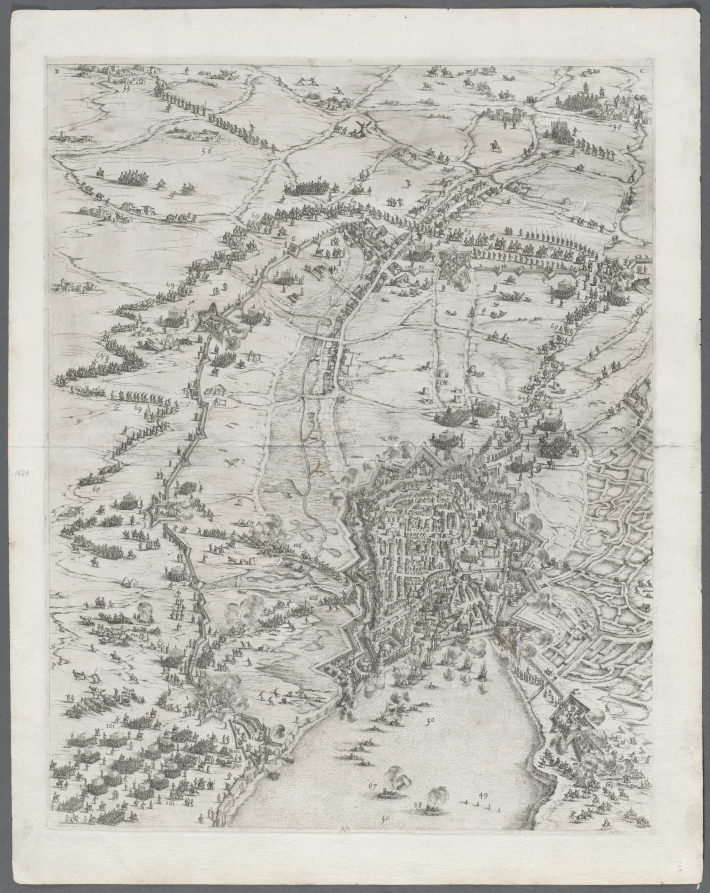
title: The Siege of La Rochelle: Plate 6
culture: France, 17th century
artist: Jacques Callot (French, 1592–1635)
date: 1628–1630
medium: etching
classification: Print